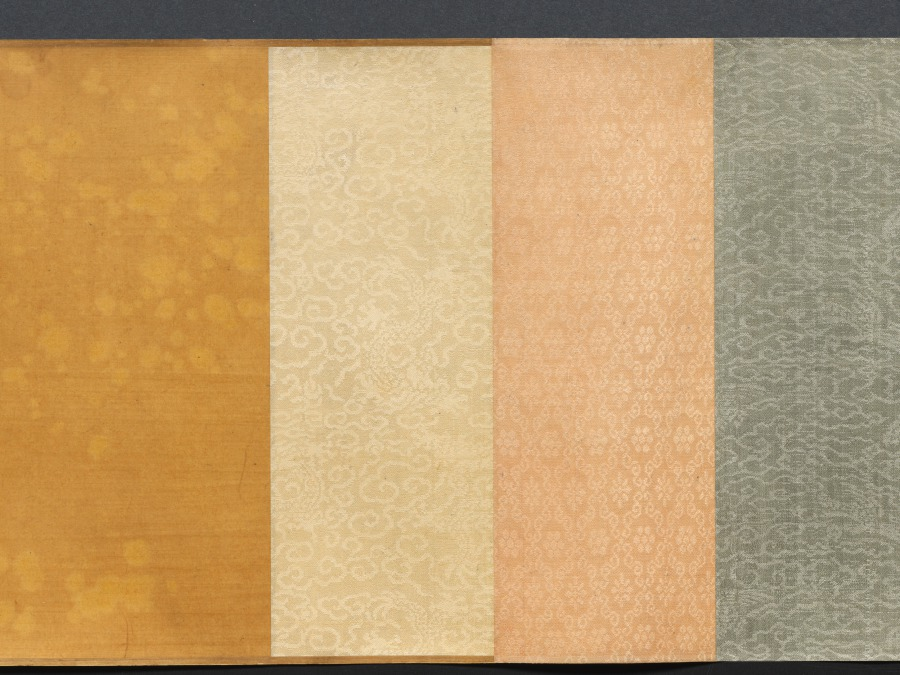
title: Flowers of Four Seasons, with Poems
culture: China, Ming dynasty (1368–1644)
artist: Wang Guxiang (Chinese, 1501–1568)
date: 1531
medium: handscroll; ink and light color on silk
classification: Painting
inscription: Artist's inscription, signature, and 15 seals. Ink Orchids. Sewn as pendants for the man of worth, swaying quiety, fragrance in the valley. [seal] Hsiao-chu ts'un Peony. Wiping his face, the young gentleman Ho [Ho Yen of Wei, Three Kingdoms] appears to have been powdered. His previous life was the perfume-stealing Han Shou [of Chin, 265–419 CE], the fragrance still lingers. [seal] Ts'un-wu chai. Flowering Crab Apple, New Bamboo. Shao-lin [Du Fu, 712–770] had to put down his brush. [Flowering Crab Apple]. Yü-k'o [Wen T'ung, d. 1079) in vain wrote poems about [Bamboo]. [seal] Yu-shih. Lotus Flowers. When she turns her head, half-hidden by a fan, and casts a glance, all the beautiful women become colorless. [seal] K'ang yüeh huai. Loquat. Ripeness in summer. [seal] Lu-chih. Pomegranate Flower. Whenever I remember you I will send my thoughts, but where have you gone--the [skirt] of pomegranate red? [seal] Wu-ho Sheng. Day Lily. Plant the day lily to forget sorrow. [seal] Yu-shih. Chrysanthemum. The untrammelled joy at the eastern fence. [seal] Lu-chih. Begonia. Comparing it to the beauties of Spring, and spreading them out as trimming for the stone steps. [seal] Yu-shih. Hibiscus. In recent years I have always enjoyed looking at flowers; instead of dark red I preferred pink ones. [seal] Jen-sheng i-lou. Narcissus, Camellia. The jade girdle left behind at Lo River. [Narcissus]. The precious pearls glitter before Spring. [Camellia]. [seal] Lu-chih. Heavenly Bamboo (Nandina domestica). A single branch in the wintry season. [seal] K'ang yüeh huai. Plum. Fragrant snow in the Lo-fou Mountains. [seal] Ts'un-wu chai. In the eleventh lunar month of the hsin-mao year of the Jiaqing era [1531], [I] imitated the boneless style of Yüan masters in sketching from life. Guxiang [seals] Yu-shih; Lu-chih. Translated by Wai-kam Ho/Lingyun Shih Liu (1980)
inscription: 2 colophons and 23 additional seals: 1 colophon dated 1632, and 2 seals of Li Jih-hua [Li Rihua] 李日華 (1565–1635); 1 colophon and 2 seals of Xiang Shengmo 項聖謨 (1597–1658); 3 seals of Liang Qingbiao 梁清標 (1620–1691); 6 seals of the Jiaqing 嘉慶 emperor (r. 1796–1820); 9 seals of Ch'eng Ch'i [Cheng Qi] 程琦 (1911–1988)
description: In this painting, flowers are loosely arranged by the seasons: narcissus and peony represent early spring; yellow loquat and lotus, summer; chrysanthemum, autumn; and the plum and evergreen bamboo, winter. The artist added to each flower a poetic line of calligraphy associating each plant with a historic or legendary figure. For example, the chrysanthemum, along with the line “The untrammeled joy at the eastern fence,” refers to the poet Tao Yuanming (died AD 427) who enjoyed chrysanthemums at the eastern fence in his garden. The scroll illustrates Wang Guxiang’s mastery of free brushwork, combining light monochrome ink with transparent colors. In his inscription, Wang says he used the “boneless” style without outlines as developed during the Yuan dynasty (1279–1368). Wang was a native of Changzhou, a city in southeast China known for its rich flora and fauna, and flower-and-bird painting tradition.